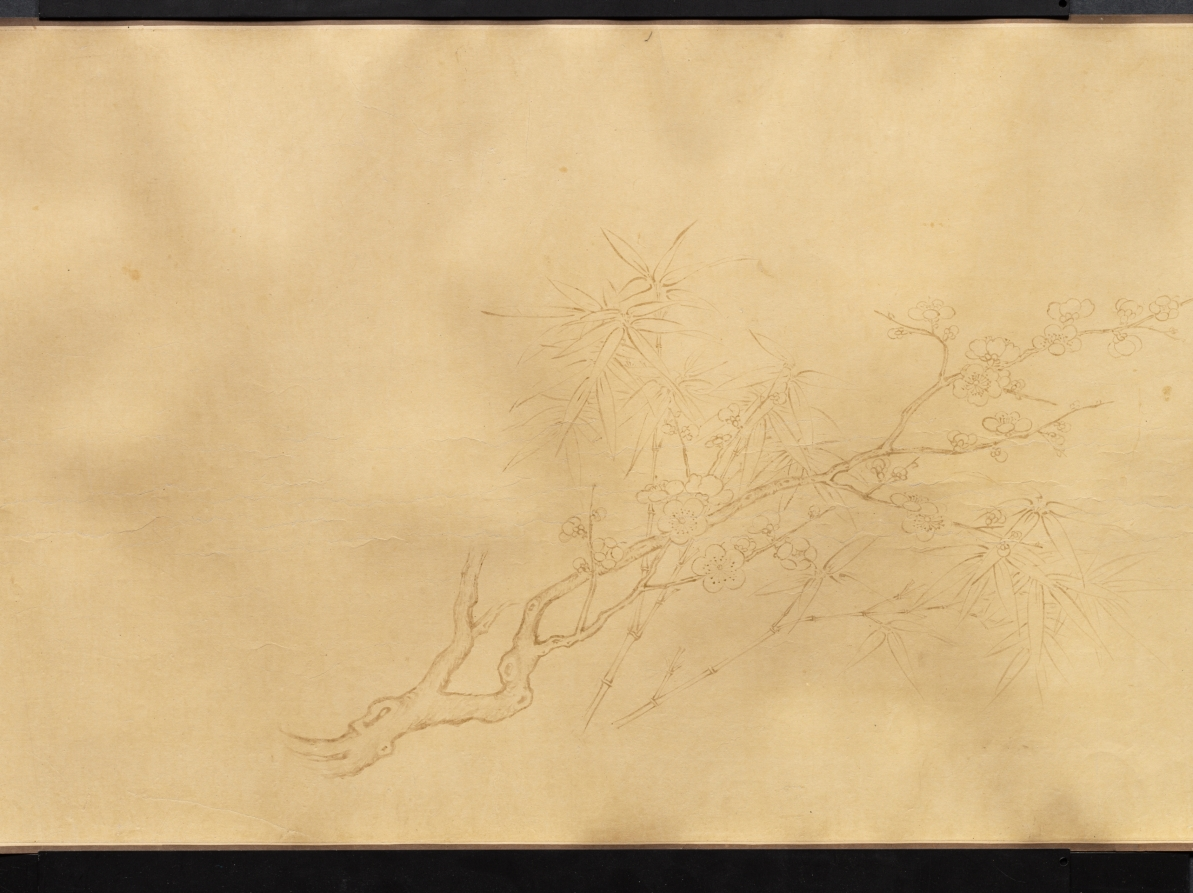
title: Landscape, The Palace of the Clouds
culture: China, Qing dynasty (1644-1911)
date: 1644–1911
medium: handscroll, ink on silk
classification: Painting